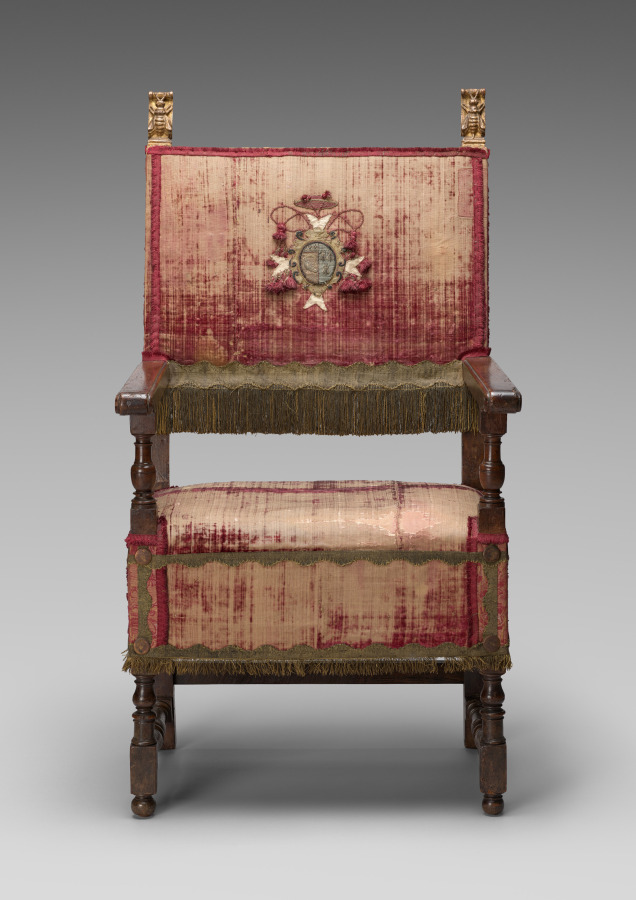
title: Armchair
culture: Italy, 17th century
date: 1600s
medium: walnut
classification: Furniture and woodwork